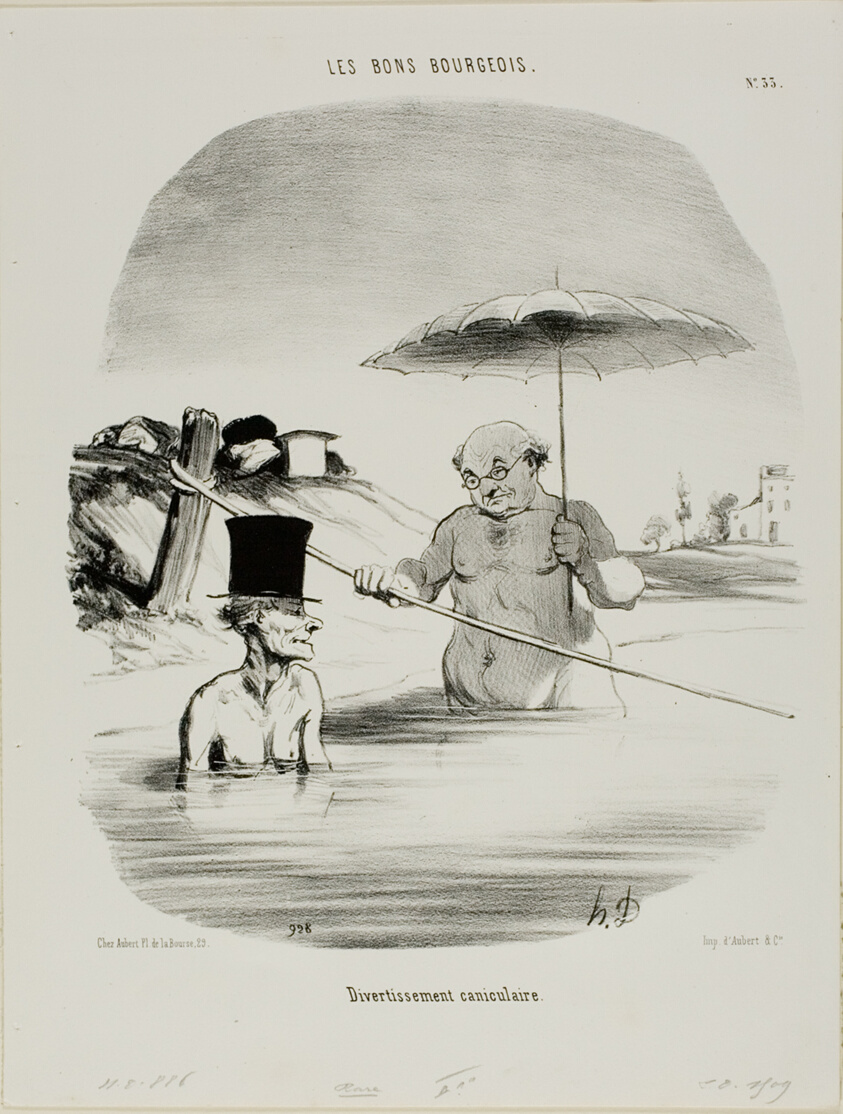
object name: Print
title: Relaxation during the dog days, plate 33 from Les Bons Bourgeois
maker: Honoré Victorin Daumier; French, 1808-1879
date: 1846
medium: Lithograph in black on white wove paper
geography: France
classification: lithograph; print; prints and drawing